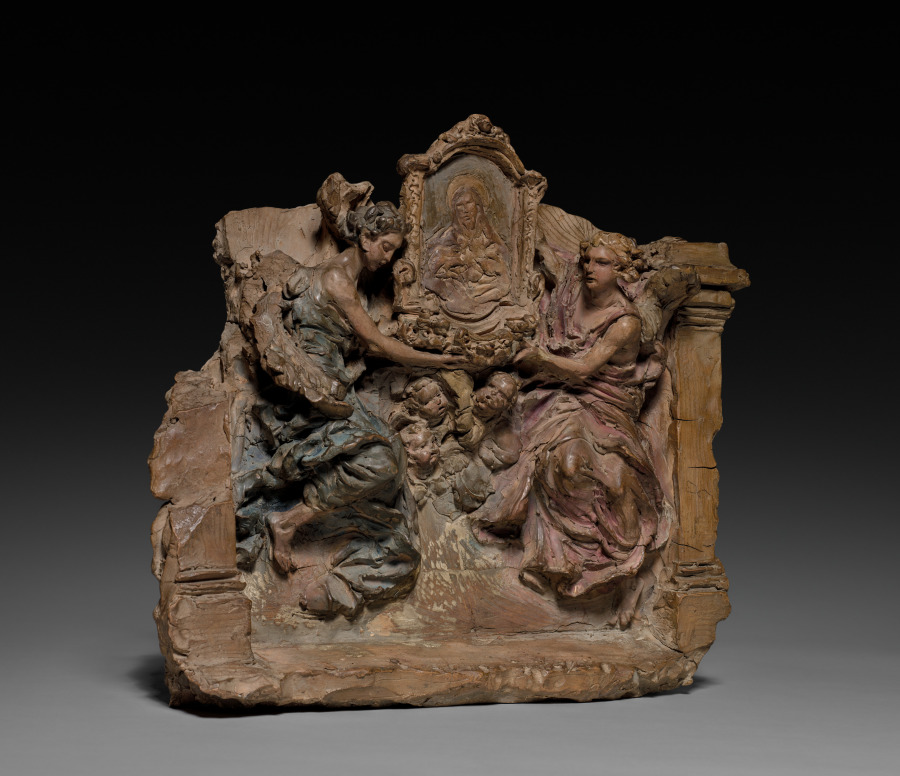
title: Two Angels and Cherubs Bearing an Icon of Christ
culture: Italy, Rome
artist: probably by Paolo Naldini (Italian, 1616–1691)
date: c. 1670–80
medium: terracotta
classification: Sculpture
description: This work is probably a study for a large altarpiece that would have combined several materials, including marble, stucco, and paint. The artist modeled his design in soft clay, which was then hardened by firing; subtle tints suggest the richness of the finished work. The idea of using sculptural figures to support a painted image within an altarpiece was influenced by the work of the Roman sculptor Gian Lorenzo Bernini (1598–1680), with whom Naldini is known to have worked.